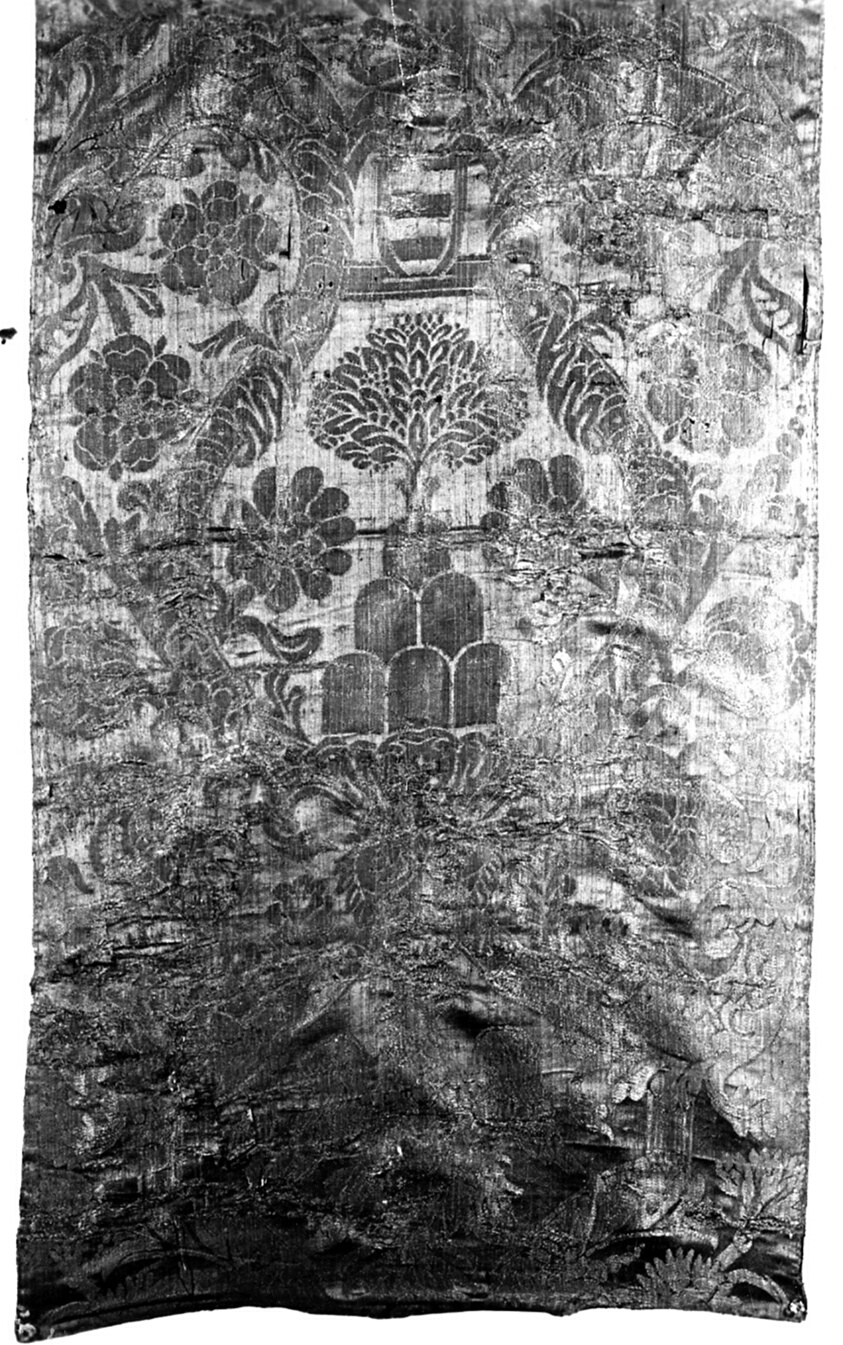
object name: Textile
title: Panel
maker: Italy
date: Late 17th century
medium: Silk, damask weave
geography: Italy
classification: textile; weaving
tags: scrolls (motifs), animals, coat of arms, fleur de lis, lions, ribbon